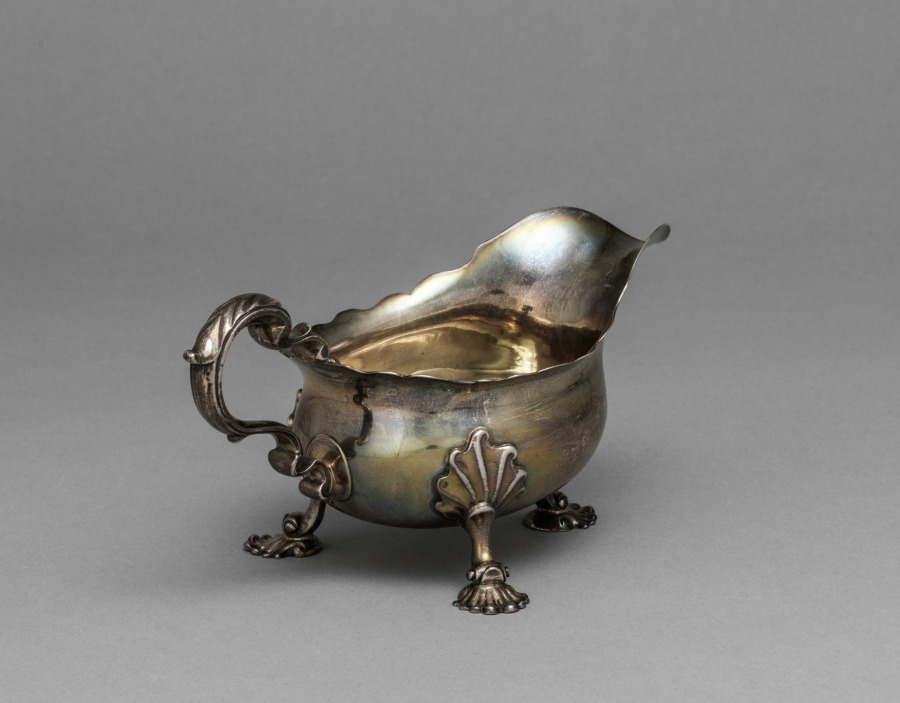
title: Gravy Boat (1 of 2)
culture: England, 18th century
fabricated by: Samuel Wood (British)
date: 1746–1747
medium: silver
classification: Silver